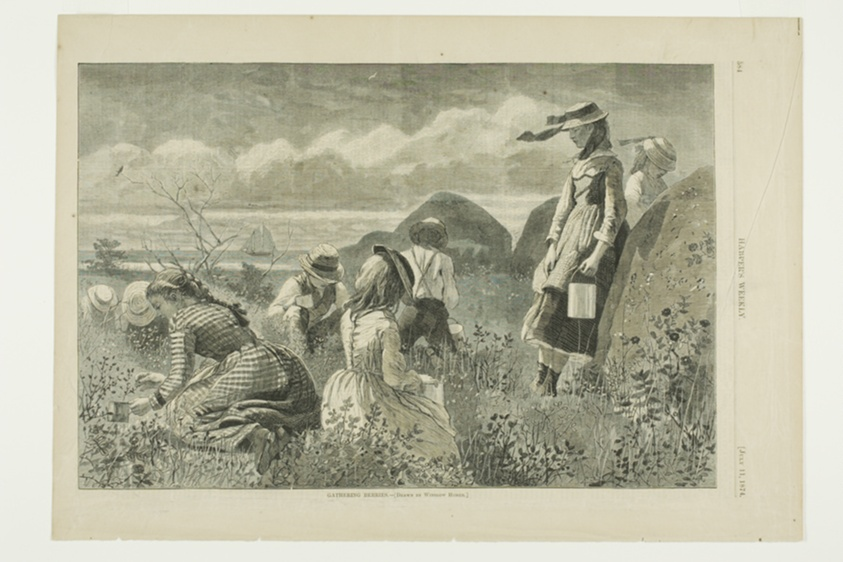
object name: Print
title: Gathering Berries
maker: Winslow Homer (American, 1836-1910); published by Harper's Weekly (American, 1857-1916)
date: published July 11, 1874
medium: Wood engraving on buff wove paper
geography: United States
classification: wood engraving; print; prints and drawing